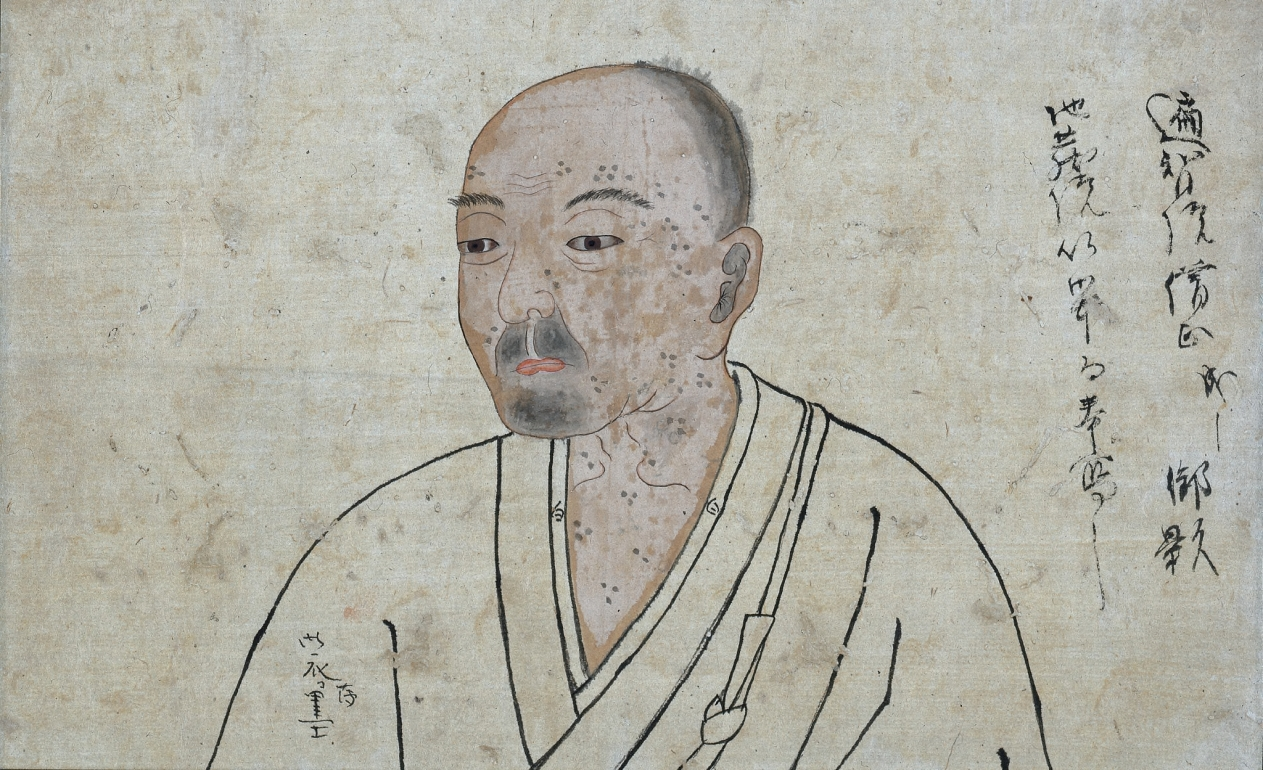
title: Portrait Study of Seigen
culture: Japan, Kamakura period (1185–1333)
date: 1300s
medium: hanging scroll; ink and slight color on paper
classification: Painting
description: This is a portrait study of the monk Seigen (1162–1231). The inscription identifies him and notes that the study is after a portrait in the subtemple Jizō’in at Daigoji. The artist included scars from an illness, and made notations about the colors the clothing should be. Seigen was abbot of Daigoji, one of the most influential Esoteric Buddhist temples in Japanese history.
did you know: The blotches on the monk's face may have been caused by smallpox.